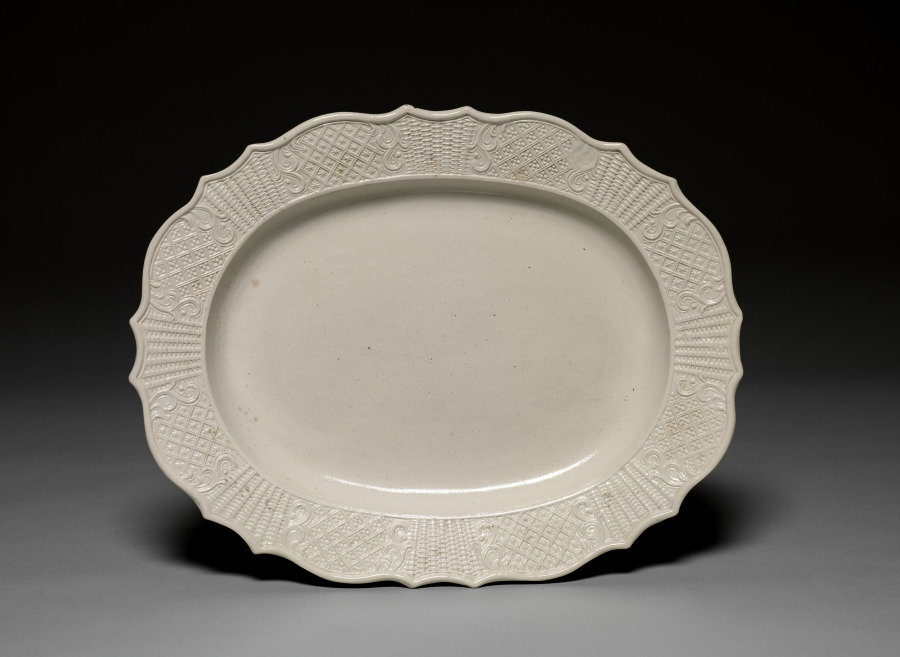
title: Platter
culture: England, Staffordshire, 18th century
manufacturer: Staffordshire Factory (British)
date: mid-1700s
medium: salt-glazed stoneware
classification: Ceramic